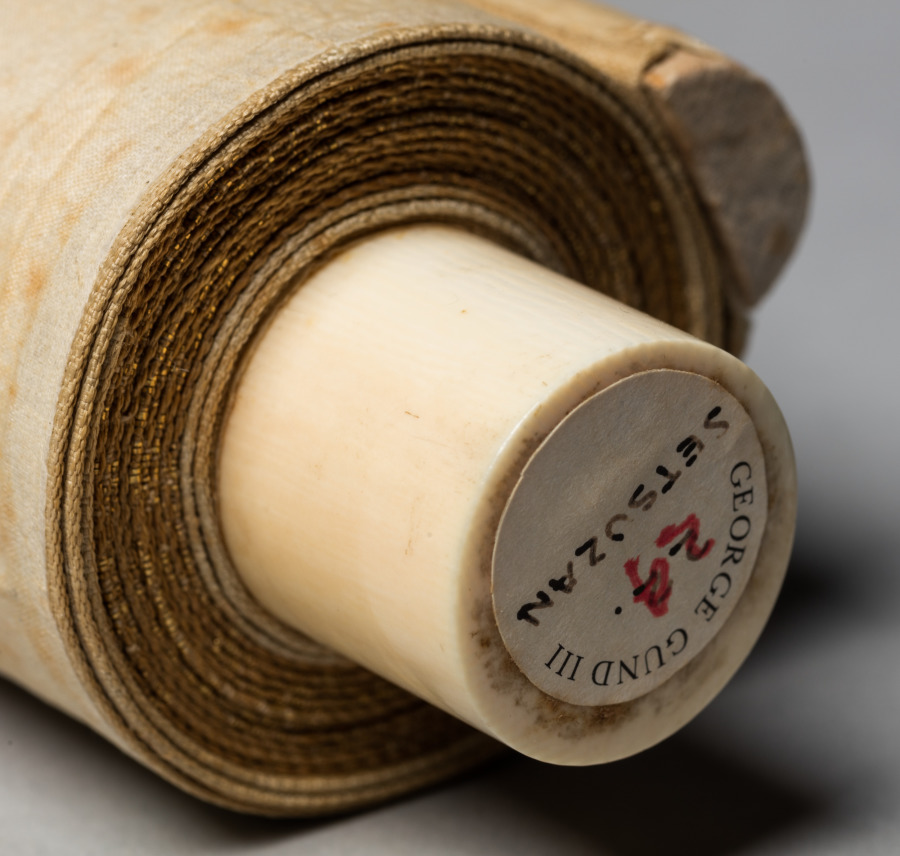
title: Mountain and River in Storm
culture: Japan, Edo period (1615–1868)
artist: Hirowatari Setsuzan (Japanese, ?-1674)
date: early to mid-1600s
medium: hanging scroll; ink on paper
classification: Painting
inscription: signed: Setsuzan hitsu